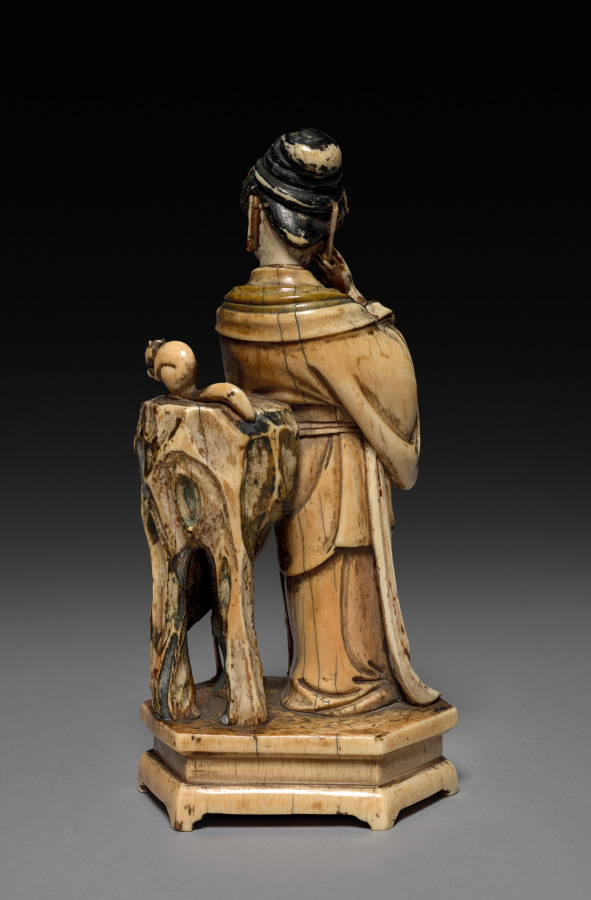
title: Female Figure with Crane and Squirrel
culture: China, Qing dynasty (1644-1911), Kangxi reign (1662-1722)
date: 1662–1722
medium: ivory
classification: Ivory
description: In the Qing dynasty (1644–1911), luxury items became more affordable to larger parts of the society, including women, merchants, and literati in non-official positions. Imperial patronage and a growing urban population encouraged consumption of luxury goods and local craftmanship. This ivory form of a woman with a crane illustrates the superb skills and the creative mind of the talented artisan who sought clients on a competitive market.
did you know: The ivory has aged to a rich amber, while traces of its original red and green paint remain on the woman’s cuffs and collar.